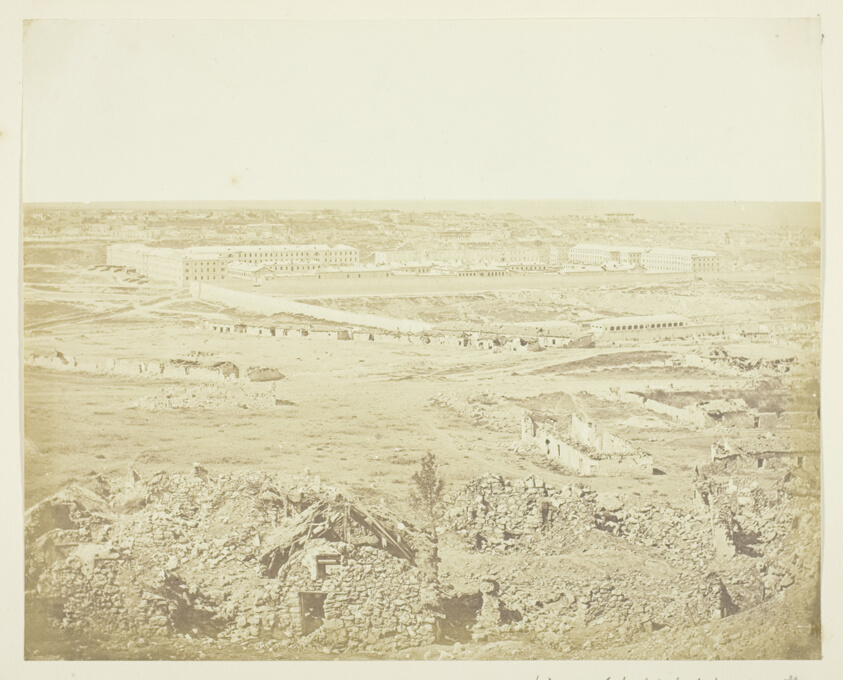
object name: Photograph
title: View of Sebastopol taken from the Malakoff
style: 19th century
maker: James Robertson (Scottish, c. 1813–d. after 1881)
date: 1855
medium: Albumen print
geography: Scotland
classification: unidentified; photography; photograph